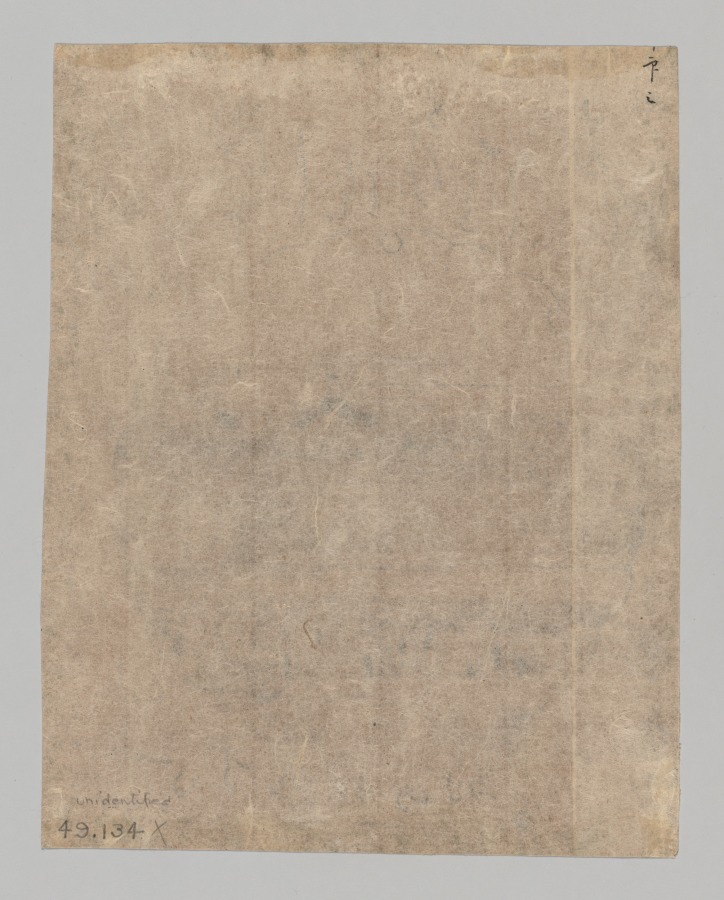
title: Sunset at Ryōgoku Bridge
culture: Japan, Edo period (1615–1868)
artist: Katsukawa Shunkō II (Shunsen) (Japanese, c. 1762-c. 1821)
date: 1806–20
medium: Woodblock print; ink and color on paper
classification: Print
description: A view of boats and riverside stalls near the Ryōgoku Bridge is captured in a roundel. The scene is accompanied by a poem. Much faded today, traces of the colors used to indicate the last rays of the sun remain. The artist signed the print “design by Shunsen” (Shunsen ga), a name he used from New Year’s of 1806, after he became a student of Katsukawa Shun’ei (1762-1819). Around the year 1820, he took the name Shunkō II. He designed prints of beauties, actors, and landscapes. In his final years, he painted designs on ceramics.